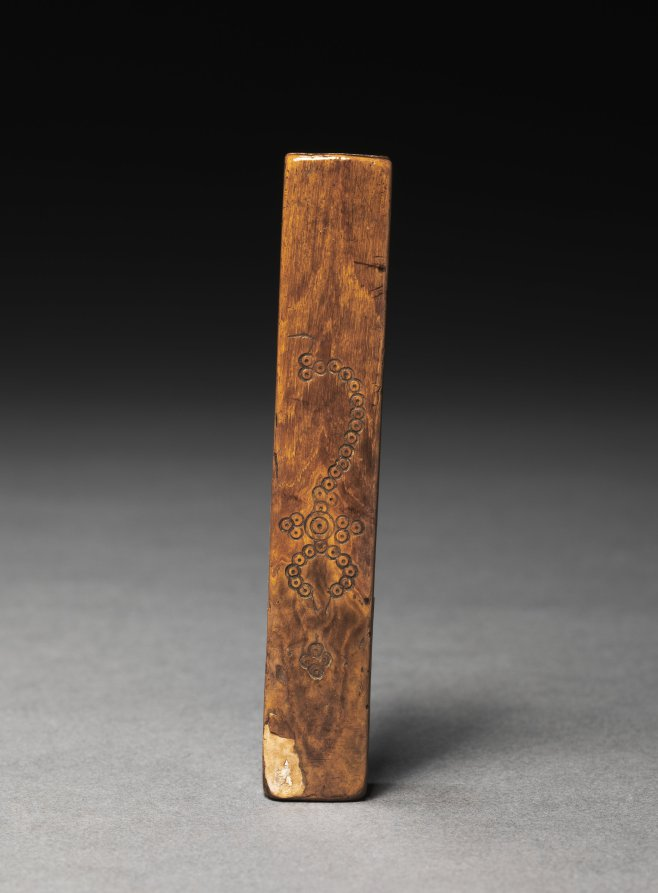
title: Talus or Die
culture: Egypt, Greco-Roman period (332 BCE–395 CE), Roman empire (30 BCE–395 CE)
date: 30 BCE–395 CE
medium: ivory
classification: Implements